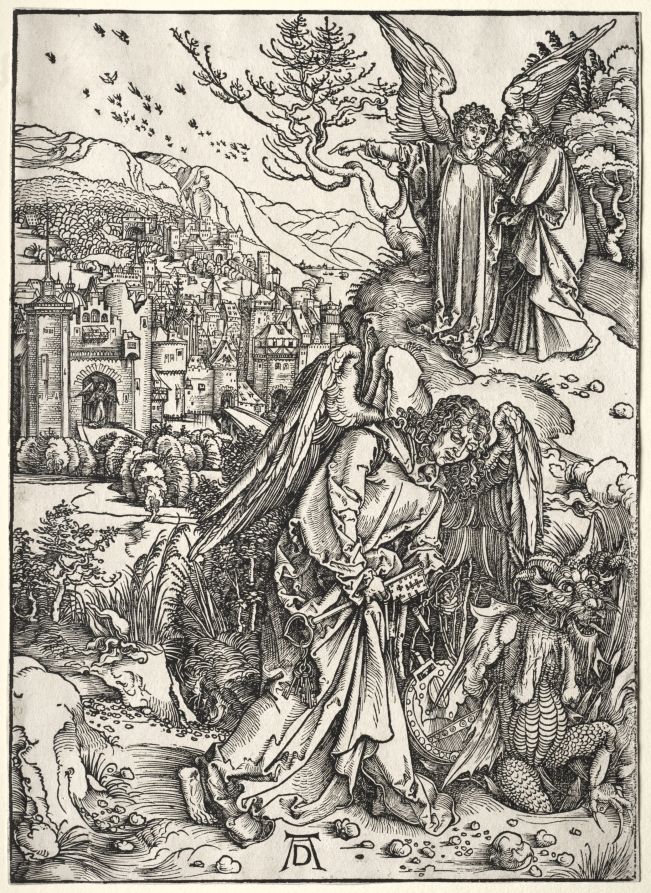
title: Revelation of St. John: Angel with the Key of the Bottomless Pit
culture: Germany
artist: Albrecht Dürer (German, 1471–1528)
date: 1511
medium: woodcut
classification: Print